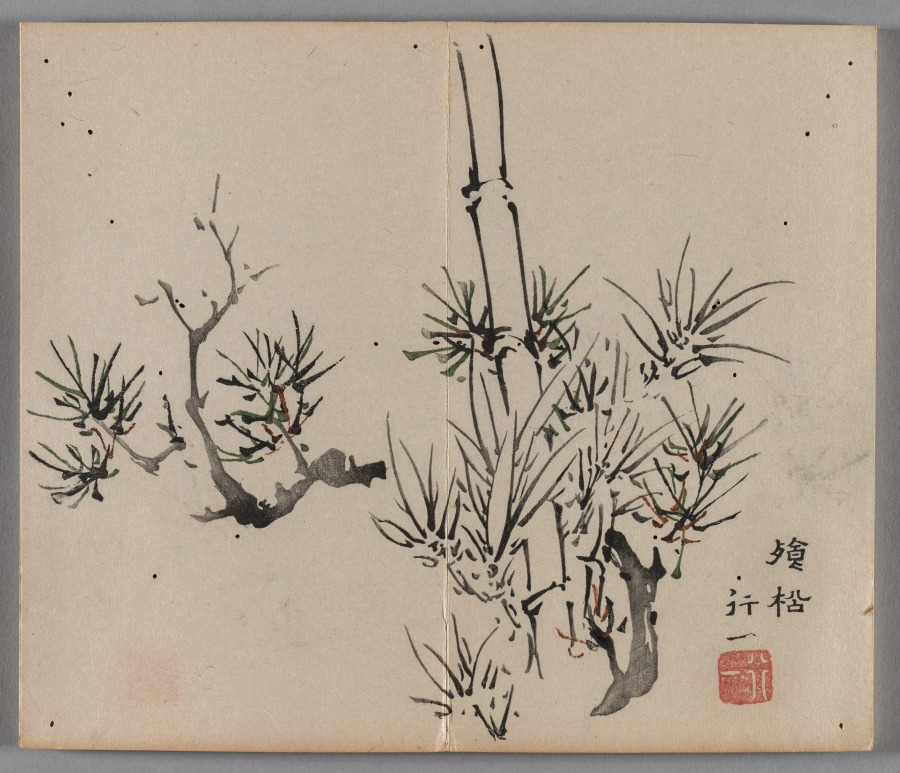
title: Ten Bamboo Studio Painting and Calligraphy Handbook (Shizhuzhai shuhua pu): Bamboo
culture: China, Qing dynasty (1644-1911)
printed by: Hu Zhengyan (Chinese, c. 1584–1674)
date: 1633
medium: Woodblock-printed book; ink and colors on paper; first edition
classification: Print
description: Color printing reached a level of perfection in the early 1600s, as seen in this Ten Bamboo Studio Collection of Calligraphy and Painting and the Mustard Seed Garden Manual of Painting (printed 1679 and 1701). The painterly quality, precision in registering (aligning) the woodblocks, and harmonious colors made them the most successful color print editions in Chinese history. Both editions were printed and compiled in Nanjing, spread nationwide, and had a great impact on the arts in Japan and Korea.